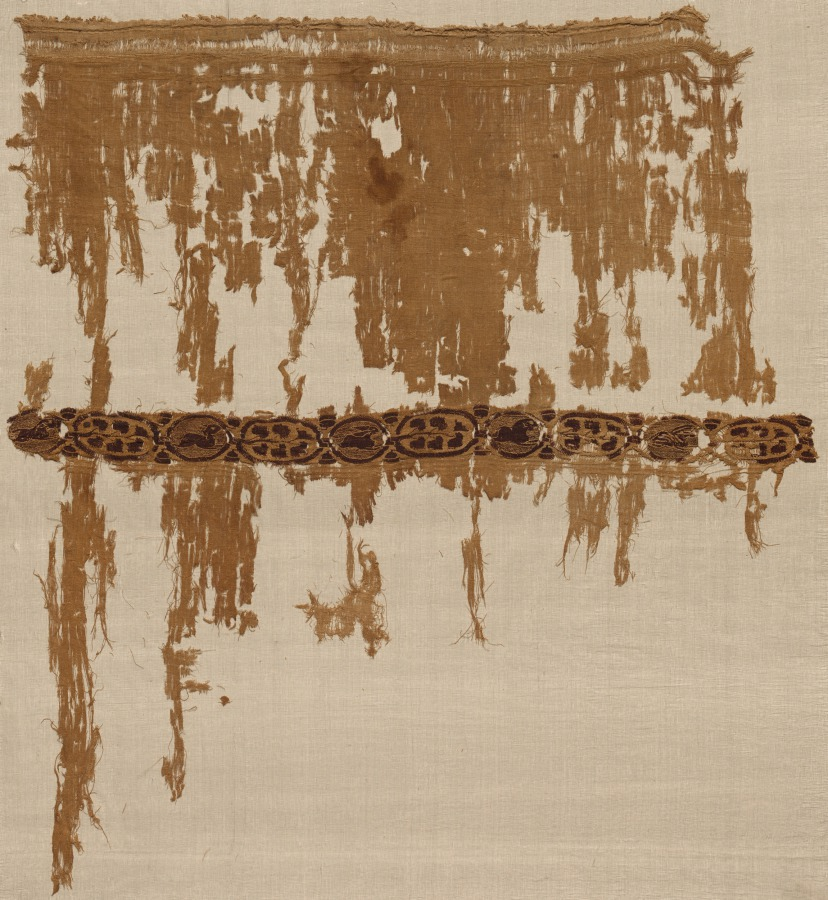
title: Fragment of a Tunic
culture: Egypt, Byzantine period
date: 400s - 500s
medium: tabby weave with interwoven tapestry ornament, linen and wool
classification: Textile